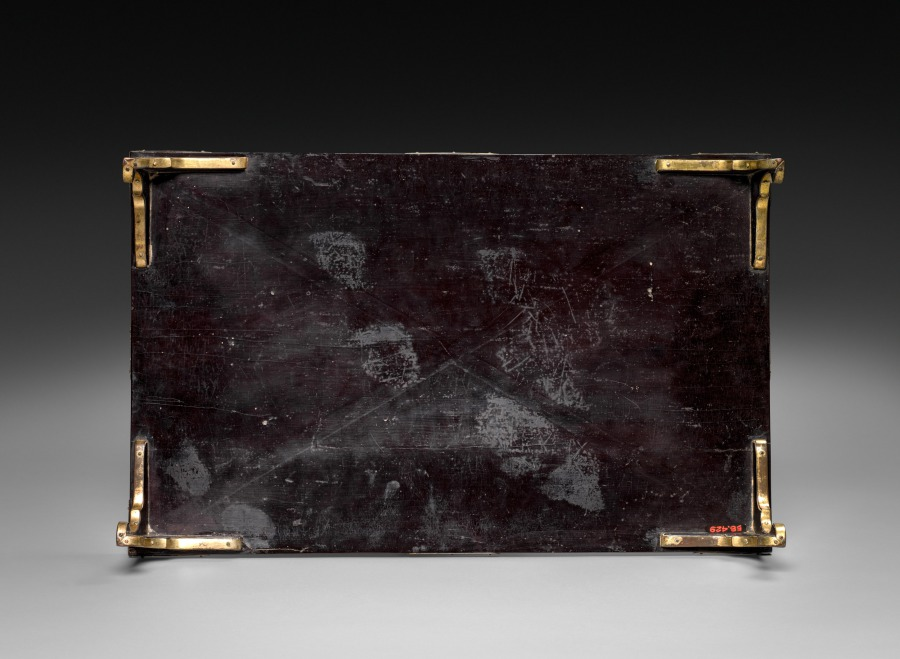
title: Writing Table with Pine, Bamboo, and Plum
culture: Japan, Muromachi period (1392–1573)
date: 1400s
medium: Lacquered wood with gold and silver sprinkled powder (maki-e) and metal fittings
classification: Lacquer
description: Low writing tables like this one were developed for use by those seated on the floor. They often had matching writing boxes. The table features the classic design of pine, bamboo, and plum, known together as the Three Friends of Winter. Indicating resilience in the face of harsh conditions, pine is evergreen, bamboo bends but does not break, and plum is the first flower to bloom in early spring. The plants are a metaphor for strength of character.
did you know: The trunks of the pine and plum are visible through the silver slopes of the ground plain.